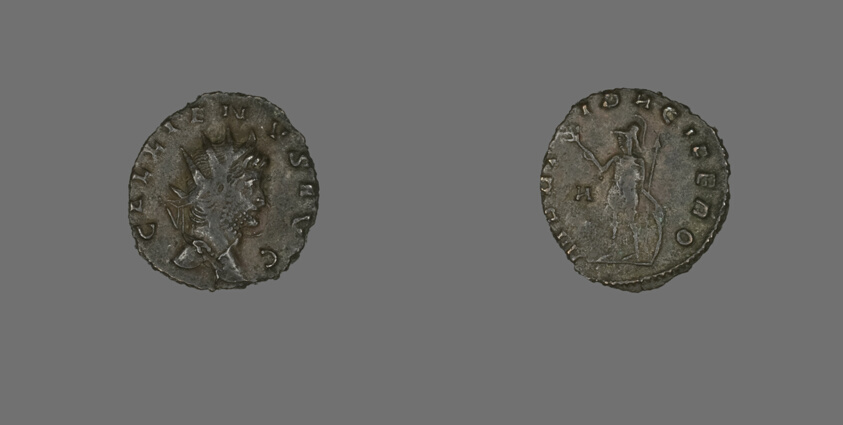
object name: Coin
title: Coin Portraying Emperor Gallienus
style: imperial (roman), ancient, roman (ancient, style or period)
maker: Roman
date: 253-268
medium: Bronze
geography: Roman Empire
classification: coin; struck; ancient art